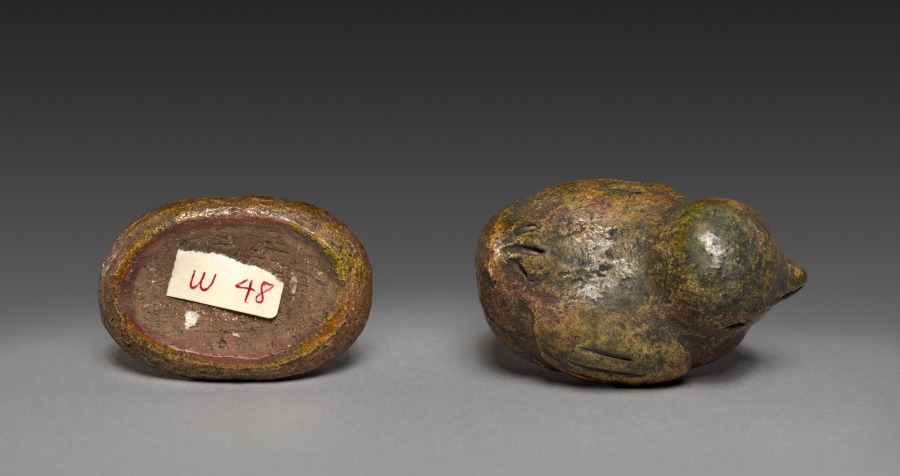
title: Incense Container (Kōgō) in the Shape of a Bird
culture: Japan, Edo period (1615–1868)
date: c. 1700–1868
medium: Stoneware with glaze and carved decoration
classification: Ceramic